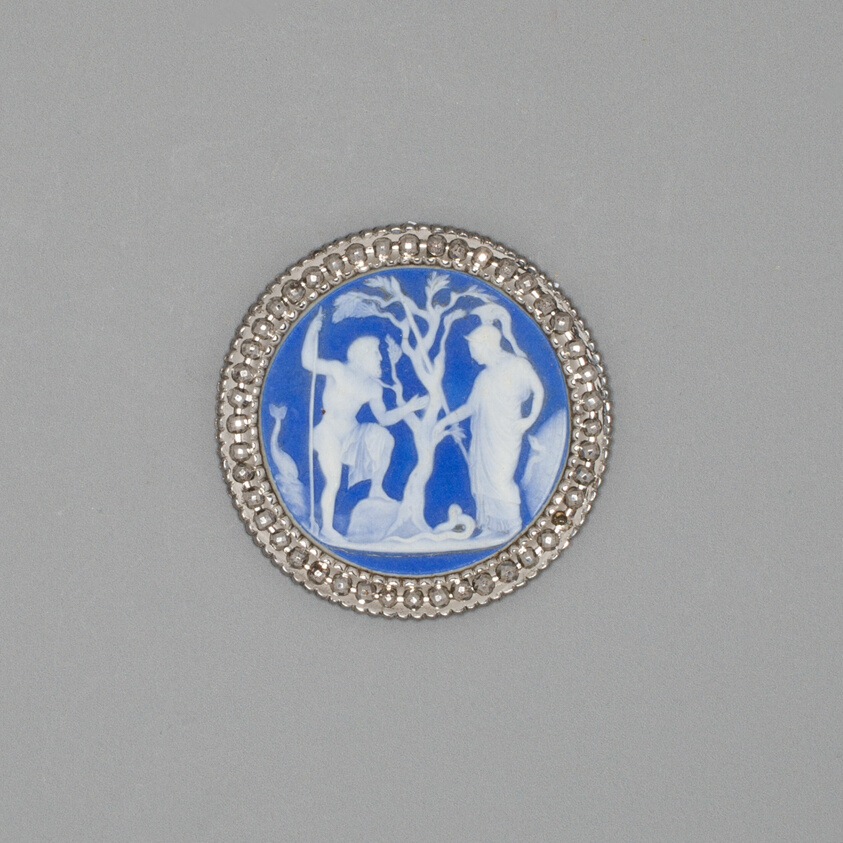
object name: Ceramics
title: Button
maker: Wedgwood Manufactory (England, founded 1759)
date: Late 18th century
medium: Stoneware (jasperware)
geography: Burslem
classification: accessories (object genre); stoneware; european decorative arts; ceramics